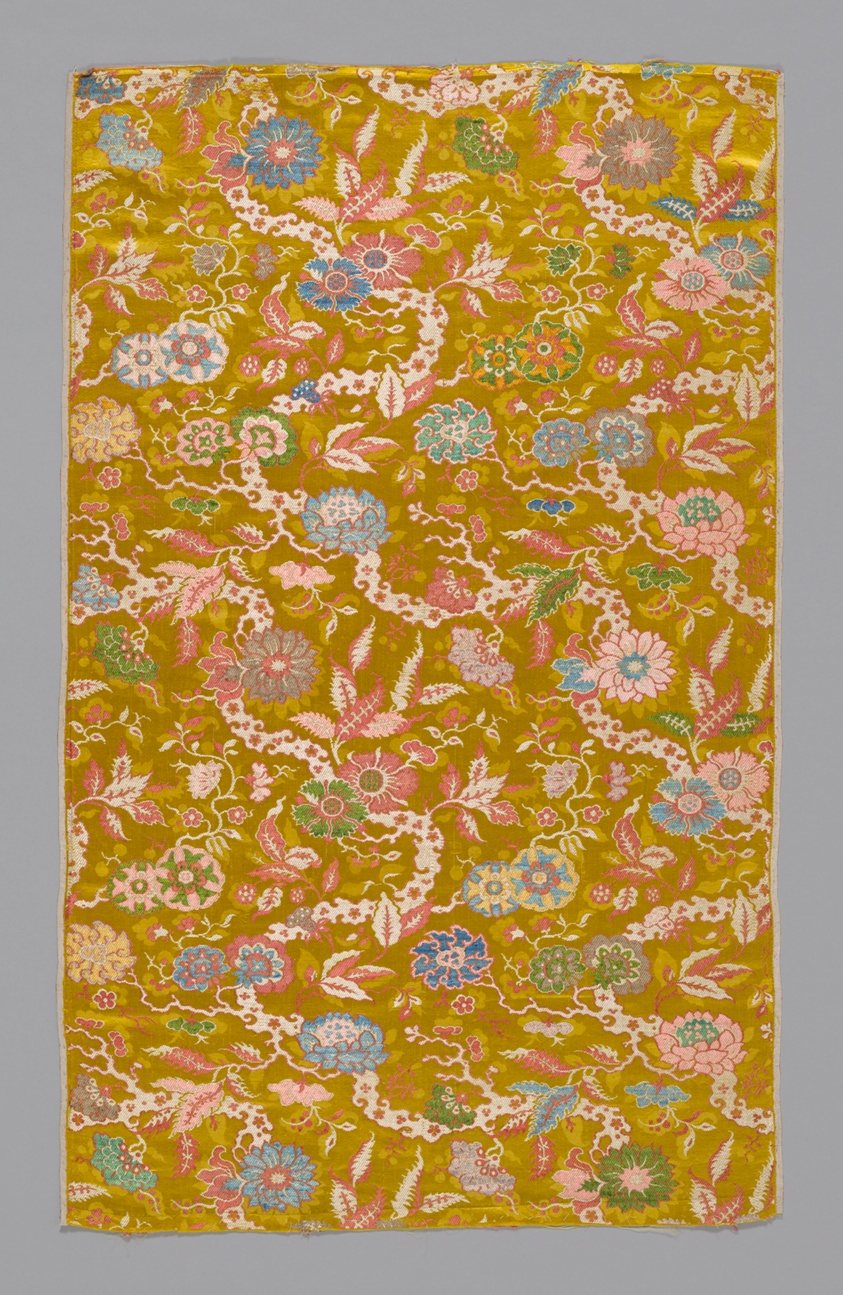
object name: Textile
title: Panel (Dress Fabric)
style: qing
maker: China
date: Qing dynasty (1644–1911), Mid–18th century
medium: Silk, satin weave with brocading wefts and self-patterning complementary ground wefts bound in twill interlacings and self-patterned by areas of plain weave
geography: China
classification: weaving; textile